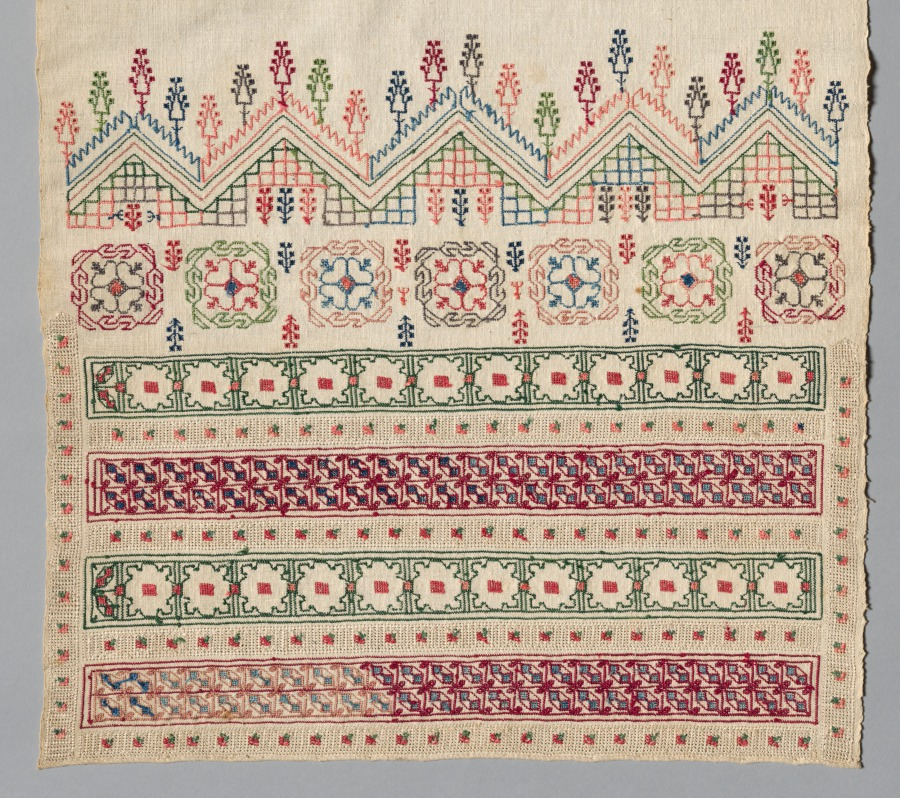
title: Embroidered Towel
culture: Turkey, early 20th century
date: early 20th century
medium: embroidery: silk on cotton tabby ground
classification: Embroidery